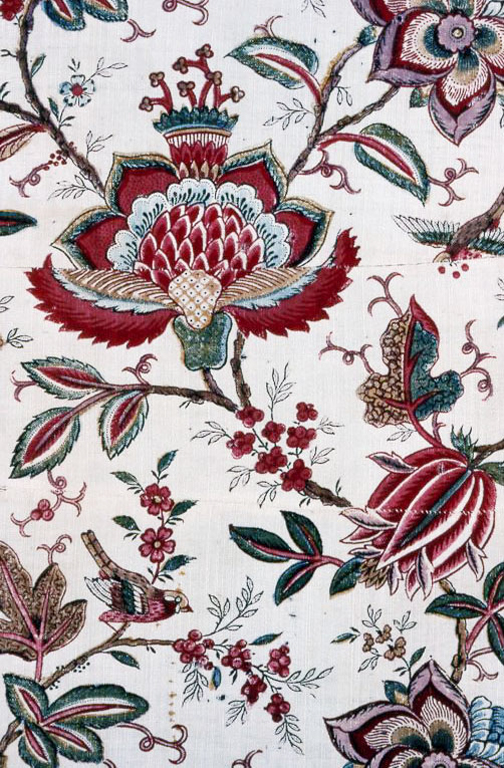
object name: Textile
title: Fragment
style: jouy-en-Josas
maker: France, probably Jouy-en-Josas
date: 18th century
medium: Cotton, plain weave; block printed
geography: France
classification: textile; weaving - printed